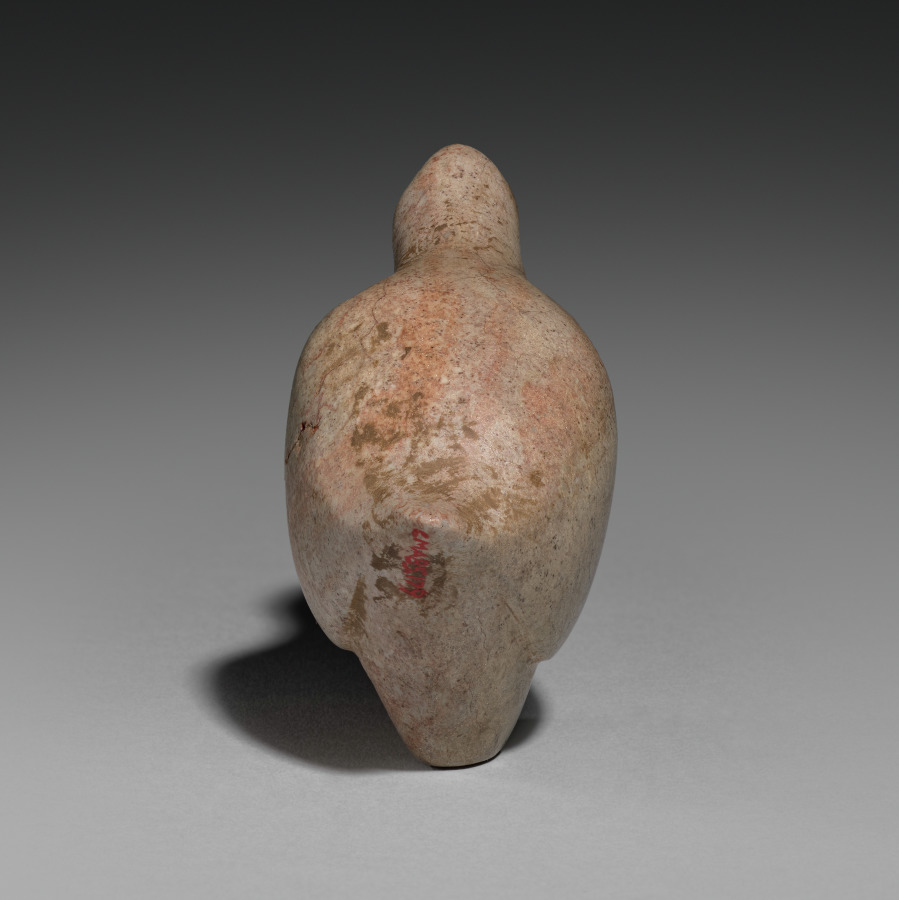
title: Nesting Quail Stamp Seal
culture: Iran, Lake Van region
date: 4000–3000 BCE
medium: dickite stone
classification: Sculpture